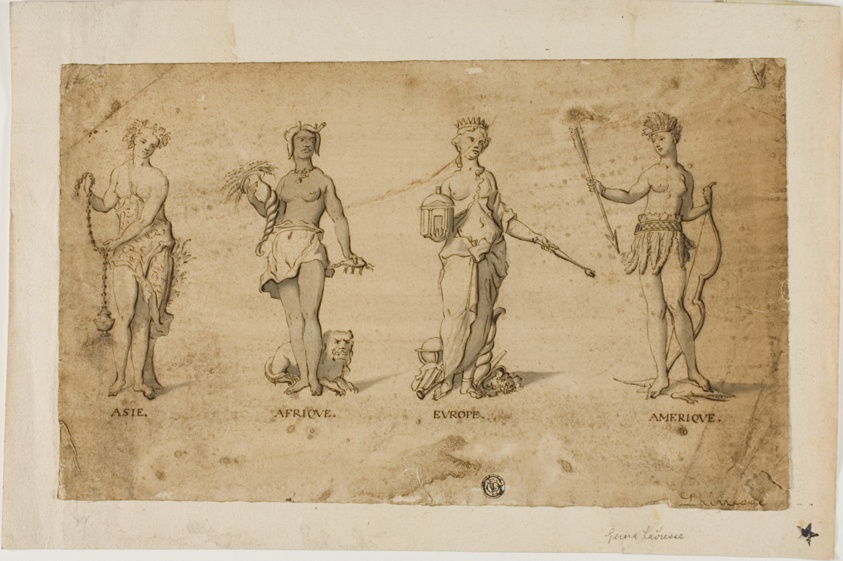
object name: Drawing and Watercolor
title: Four Continents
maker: Attributed to Gerard de Lairesse; Flemish, 1640-1711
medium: Pen and brown ink, with brush and gray wash, on tan laid paper, tipped on ivory laid paper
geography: Flanders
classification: pen and ink drawings; drawings (visual works); prints and drawing